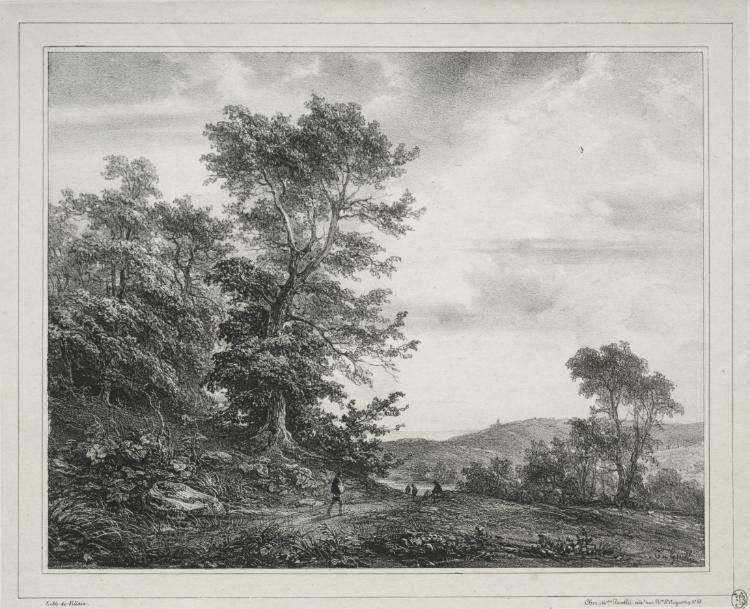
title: Landscape with Figures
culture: France, 19th century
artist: Théodore Gudin (French, 1802–1880)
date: 1817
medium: lithograph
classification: Print